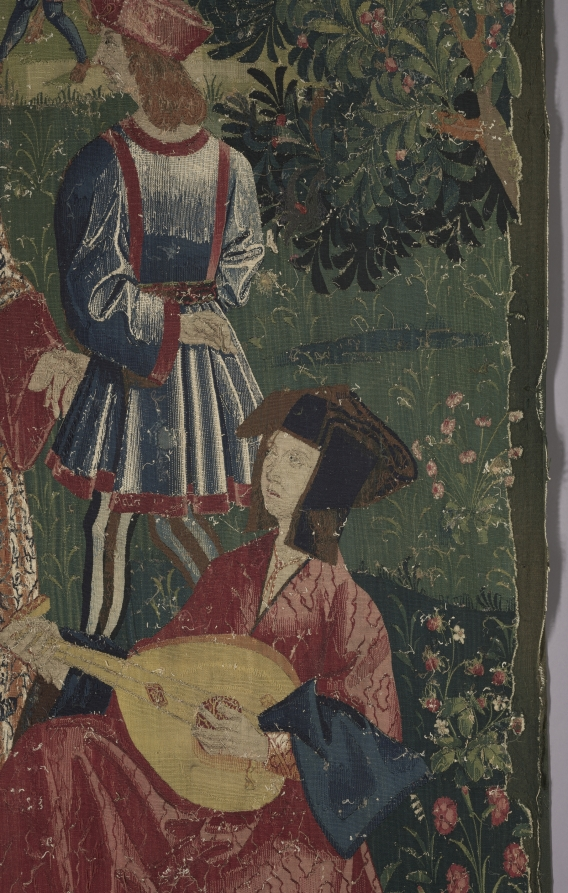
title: Youth (from Chateau de Chaumont set)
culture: France, Lyon(?), early 16th century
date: 1512–15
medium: silk and wool; tapestry weave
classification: Tapestry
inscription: French verse in Gothic letters translates as follows: Youth triumphs while its heart is healthy, And when it seems to hold all in its hand. But this triumph is without eternity. Here one sees the example full well: Those who are happy hide death in thier heart. Let the young heed this warning.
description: Louise of Savoy (1476-1531), queen mother of King Francis I, is depicted here in a sumptuous brocaded velvet in the center. She addresses youthful figures including Éléonore, Pierre Sala’s daughter who is facing her future husband, Hector. On the right, King Louis XII (died 1514) stands in front of the Chateau Langais where he had married Anne of Brittany. Above is Hector’s deceased father with a partially concealed skull under his robe, while a woman expresses surprise at the sight. The verse in Old French at the top states that youthful happiness is not eternal: Youth makes sounds as long as its heart is healthy, And thinks that it holds all in its hand. But this triumph is not eternal. Here you see clearly an example: He that is happy has death in his breast. Of this you people should take note.